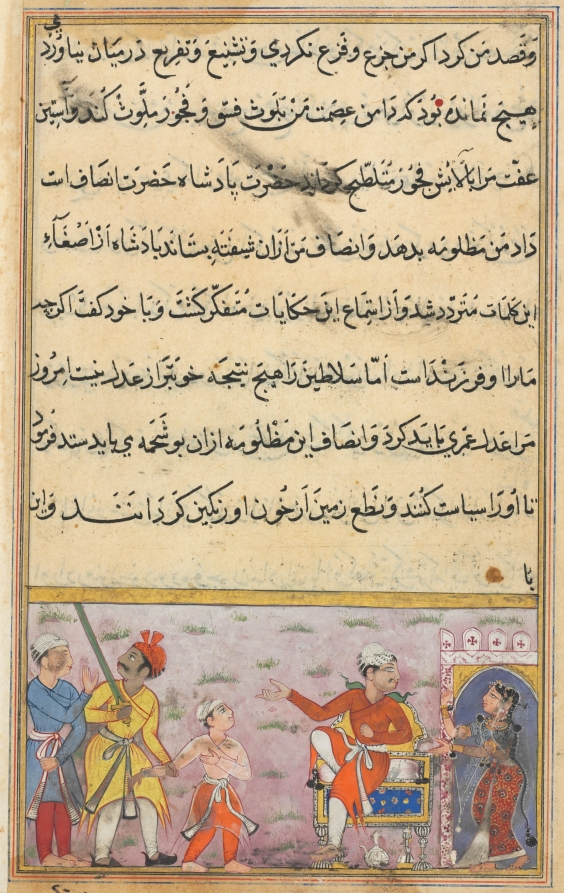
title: The prince being taken away for execution on the false complaint of the handmaiden, from a Tuti-nama (Tales of a Parrot): Eighth Night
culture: Mughal India, court of Akbar (reigned 1556–1605)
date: c. 1560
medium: gum tempera, ink, and gold on paper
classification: Painting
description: Embarrassed and angry that the prince rejected her advances, and worried that he will tell the king of her misconduct, the handmaiden preempts him by falsely accuses the prince of assaulting her. Since he has taken a vow of silence, he does not defend himself, so the king orders the prince to be beheaded.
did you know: The prince’s execution is prevented by the king’s viziers, who recount a series of moralizing stories.